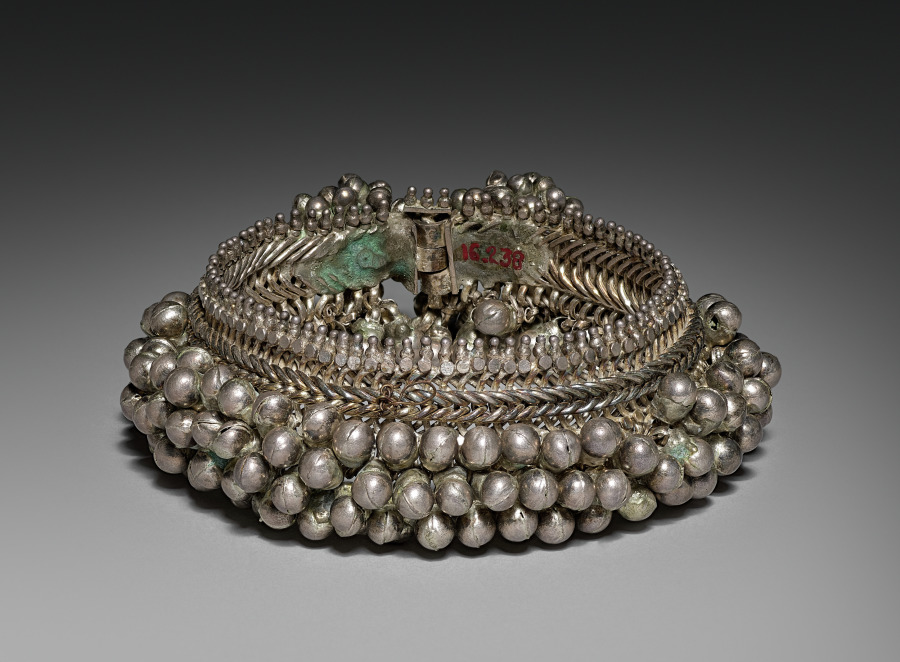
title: Anklet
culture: India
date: 1800s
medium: silver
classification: Jewelry